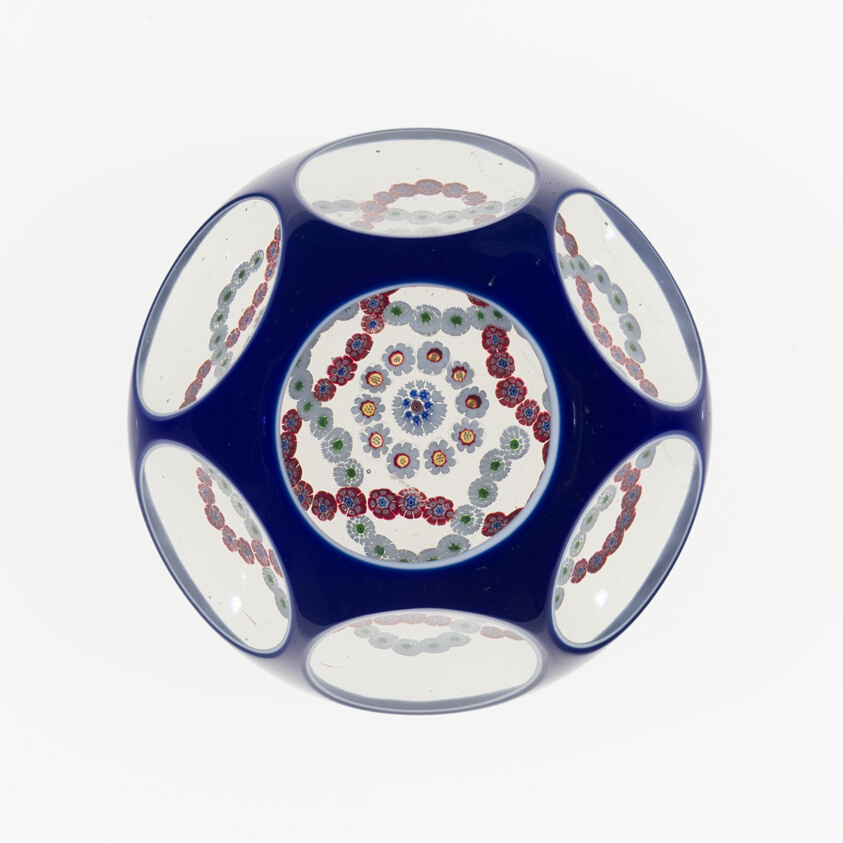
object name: Glass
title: Paperweight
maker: Baccarat Glassworks (Cristalleries de Baccarat); Lorraine, France, founded 1764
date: c. 1845/60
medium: Glass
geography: France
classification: paperweight; glass